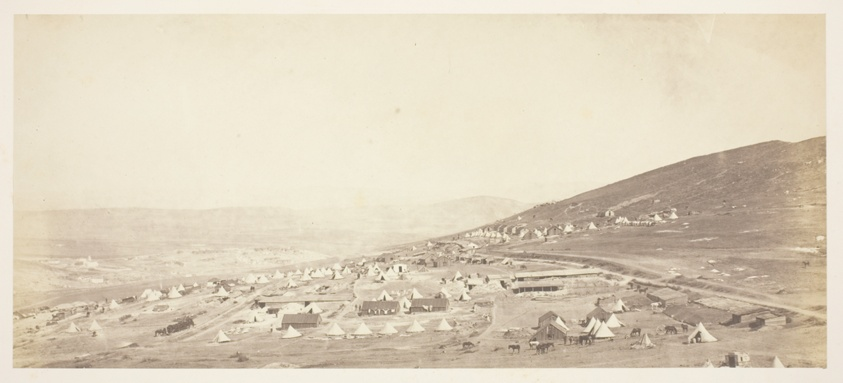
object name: Photograph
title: Camp of the 4th Light Dragoons, Officer's Quarters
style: 19th century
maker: Roger Fenton (English, 1819–1869)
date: 1855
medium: Salted paper print, from the album "Photographic Pictures of the Seat of War in the Crimea" (1856)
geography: England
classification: salted paper print; photographic process; photography; photograph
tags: Collected by Hugh Edwards